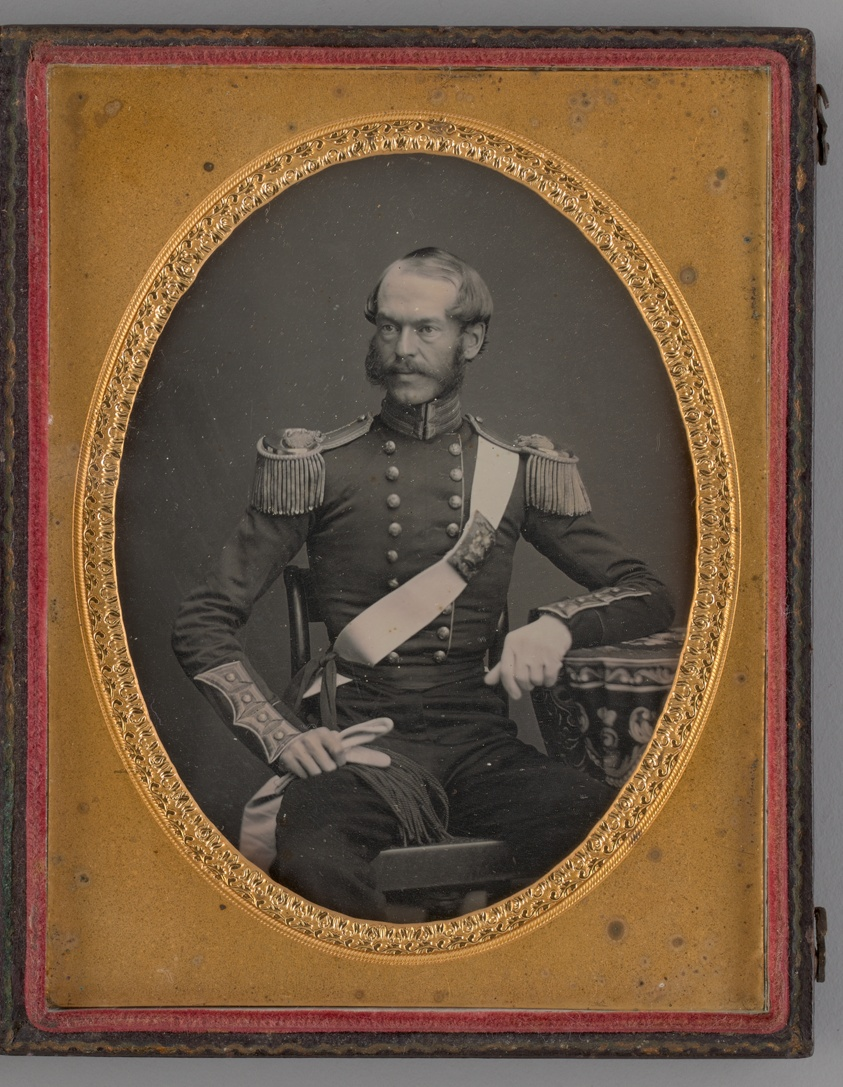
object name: Photograph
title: Untitled (Portrait of a Seated Man in Military Uniform)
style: 19th century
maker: Unknown maker; American, 19th century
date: 1858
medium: Daguerreotype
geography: United States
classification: portrait; photography; photographic process; photograph; daguerreotype; portrait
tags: lundberg collection, portraits: male subject, portraits, portrait, military uniforms, military